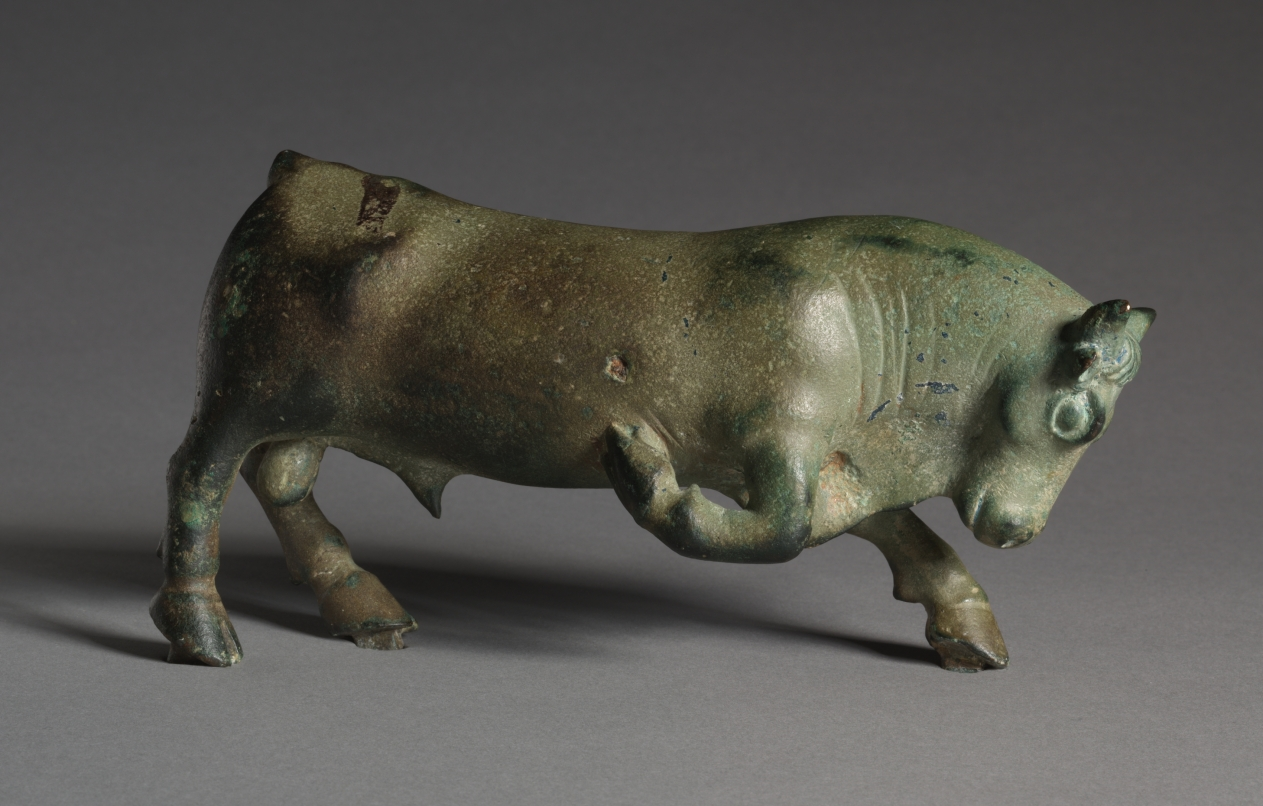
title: Pawing Bull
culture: South Italy, Lucania, Greek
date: 500–475 BCE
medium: bronze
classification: Sculpture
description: With its head slightly lowered and right foreleg raised in a pawing motion, this robust bull seems poised for action. The pose closely resembles that of bulls on coins minted at Thurii, a Greek colony in South Italy, but the statuette seems earlier in date and could have other associations. Perhaps the bull once carried the princess Europa, for example, or battled a lion or a hero. Alternatively, it may have stood alone as a small-scale offering, representing the actual bulls sometimes sacrificed to deities.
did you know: This solid-cast bronze bull is nearly intact, missing only its tail.